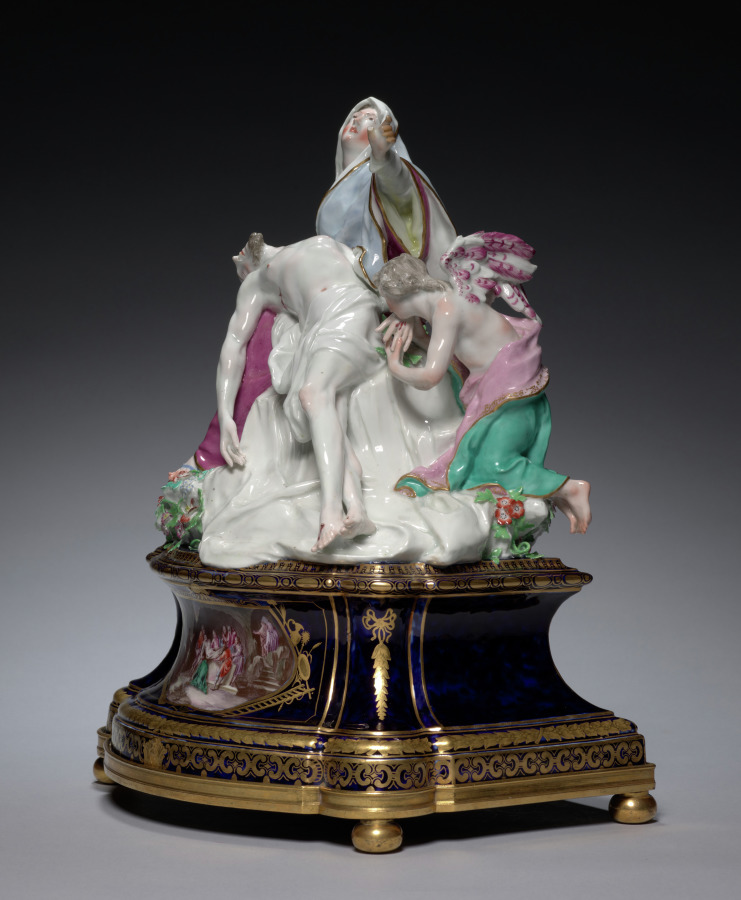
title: Figure of the Pietà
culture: England, London, Chelsea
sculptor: Joseph Willems (Flemish, 1715–1766)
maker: Chelsea Porcelain Factory (Britain, London, 1745–84)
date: c. 1761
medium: Soft-paste porcelain, painted in enamels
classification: Ceramic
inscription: Painted in gilt over the glaze at base of figure on the reverse: [a gold anchor]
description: The distinctively Roman Catholic subject of Mary cradling her son, the crucified Christ, suggests this figure was probably made for one of the aristocratic English families forced to practice their Catholicism in secret during the mid-1700s. Because of the laws banning Catholic worship in England, grand houses were often modified to include private chapels or rooms in private quarters where visiting priests delivered the sacraments in defiance of the laws favoring Protestant worship. A figure of this size and type likely would have served as an important devotional focal point within that context.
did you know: Only three examples of this figure by the Chelsea Porcelain Factory are known to exist.